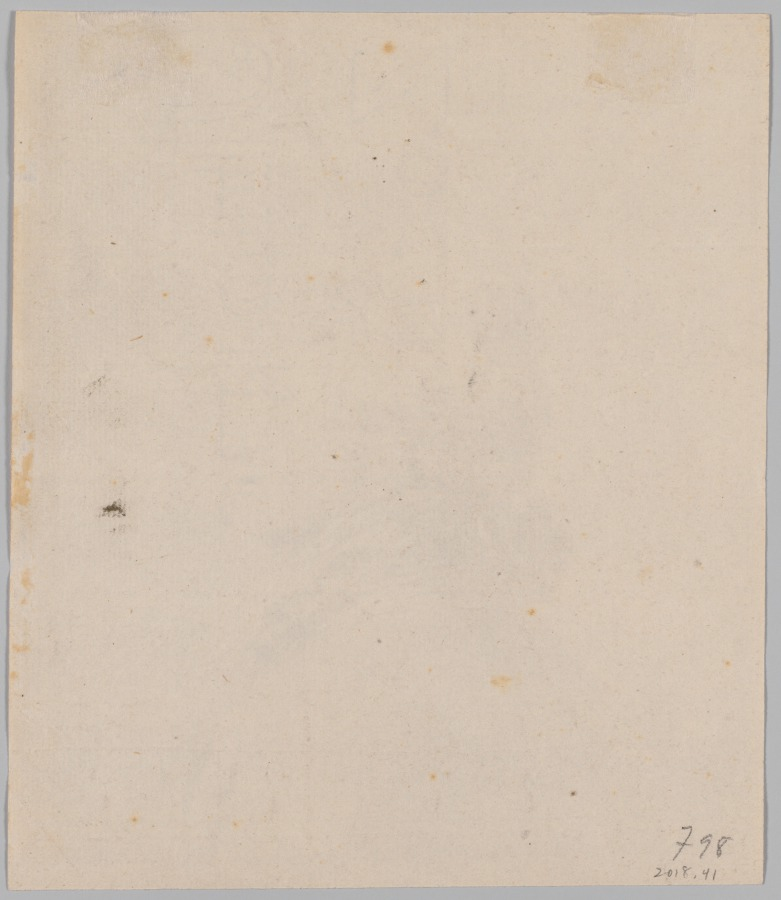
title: Profile Portrait of a Man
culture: France, 19th century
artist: attributed to Louis Rolland Trinquesse (French, c. 1746–c. 1800)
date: 18th century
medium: Black chalk counterproof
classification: Drawing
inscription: verso: lower right corner, in graphite: 798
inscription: mount, lower right, in graphite: Contre éprecue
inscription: verso of mount: center, in graphite: 798 / Ctm Epr. Trinquesse; upper left corner, in graphite: trinquessé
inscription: Countermark: center: J Honig / & / Zoonen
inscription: framer’s sticker: R. Charpentier/ 104.Ba Haussmann/ Paris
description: This portrait bust is a counterproof: the reverse image of a composition, made by placing blank paper on top of a drawing and transferring the design with pressure. Eighteenth-century artists frequently made counterproofs of their drawings to replicate their work. This process also enabled them to experience how their images would appear if they were reproduced as prints.